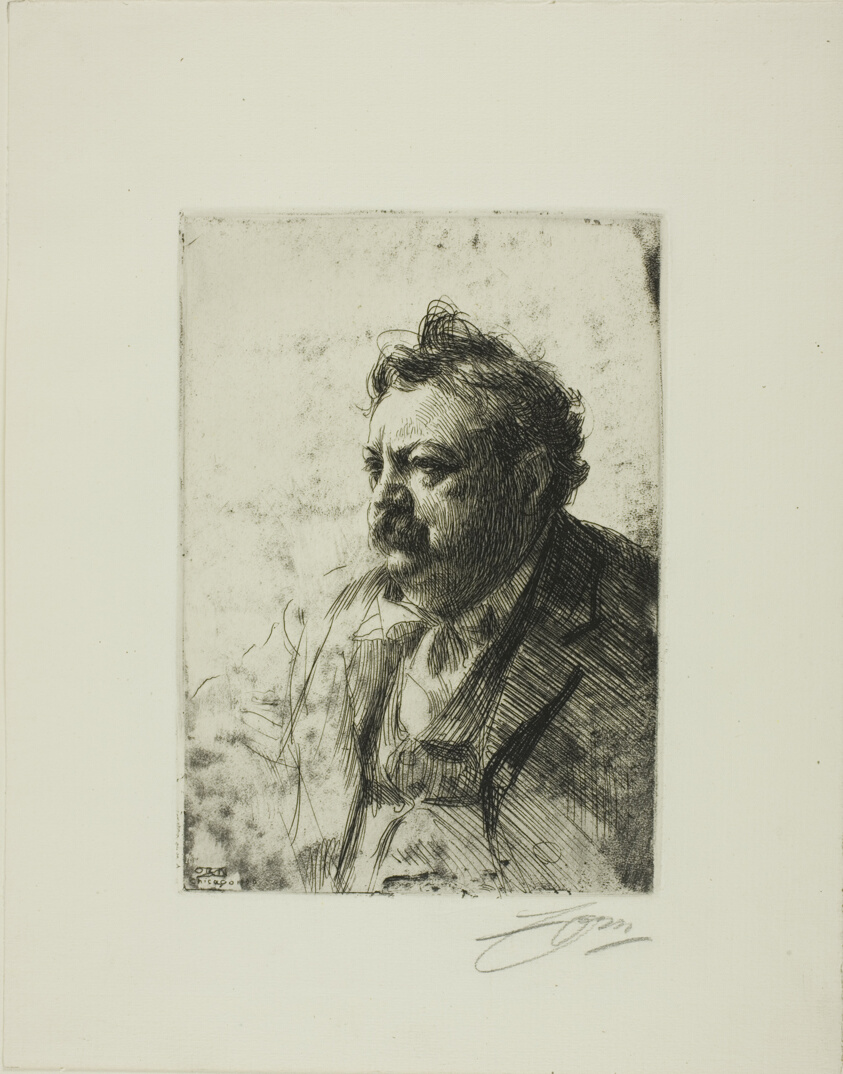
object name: Print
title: Billy Mason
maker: Anders Zorn (Swedish, 1860-1920)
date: 1900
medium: Etching on ivory laid paper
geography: Sweden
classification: etching; print; prints and drawing